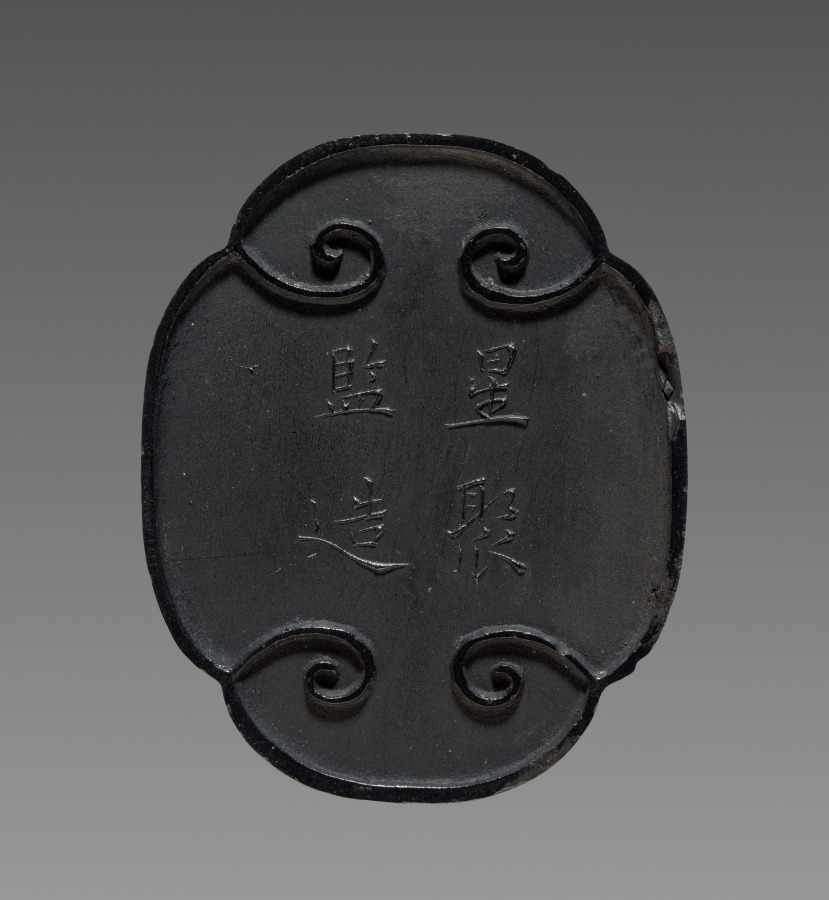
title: Ink Cake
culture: China, Qing dynasty (1644-1911)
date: 19th Century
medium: ink cake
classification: Miscellaneous